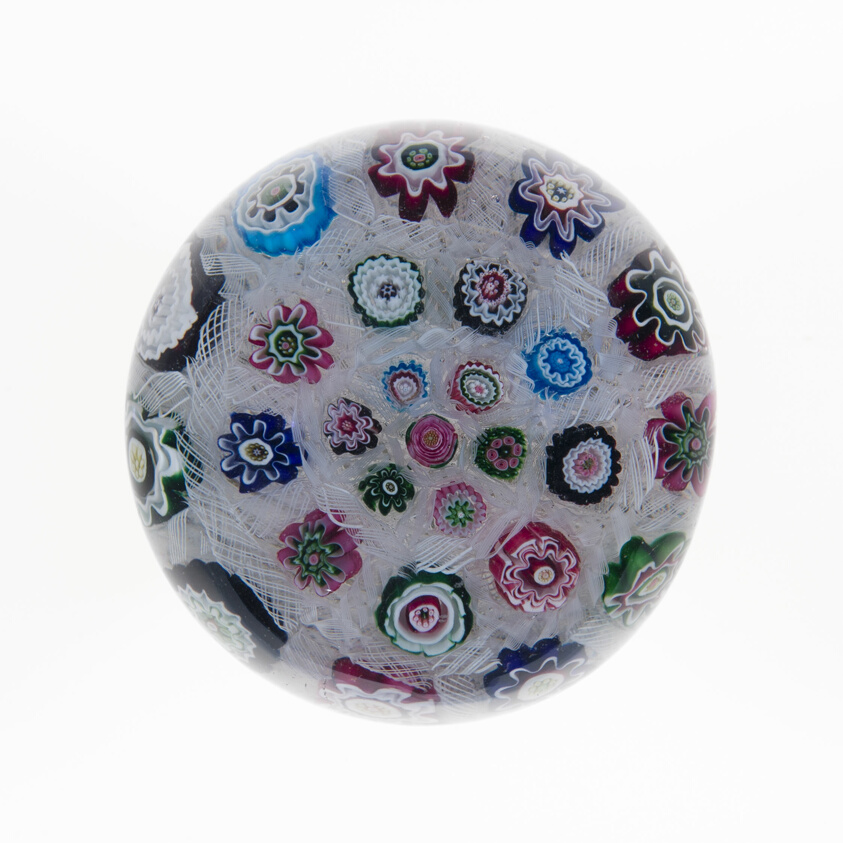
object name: Glass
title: Newel post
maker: Clichy Glassworks (Cristalleries de Clichy); Clichy, France, 1837-1885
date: 19th century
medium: Glass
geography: Clichy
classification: paperweight; glass